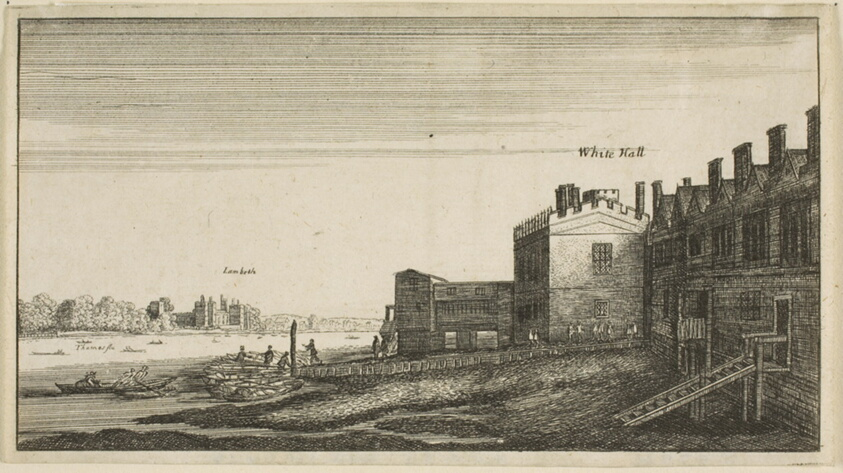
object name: Print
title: View of Lambeth Palace from the River at Whitehall Stairs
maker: Wenceslaus Hollar (Bohemian, 1607-1677)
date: 1643/44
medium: Etching on ivory laid paper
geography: Bohemia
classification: engraving; print; prints and drawing